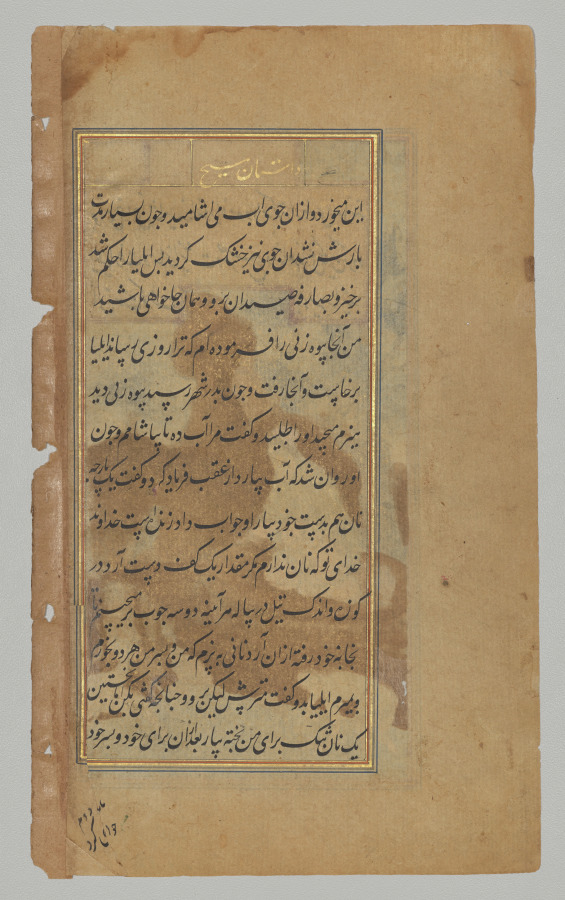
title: Text page from a Mirror of Holiness (Mir’at al-quds) of Father Jerome Xavier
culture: Mughal India, Allahabad, made for Prince Salim (1569–1627)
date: 1602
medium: Ink and gold on paper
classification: Manuscript